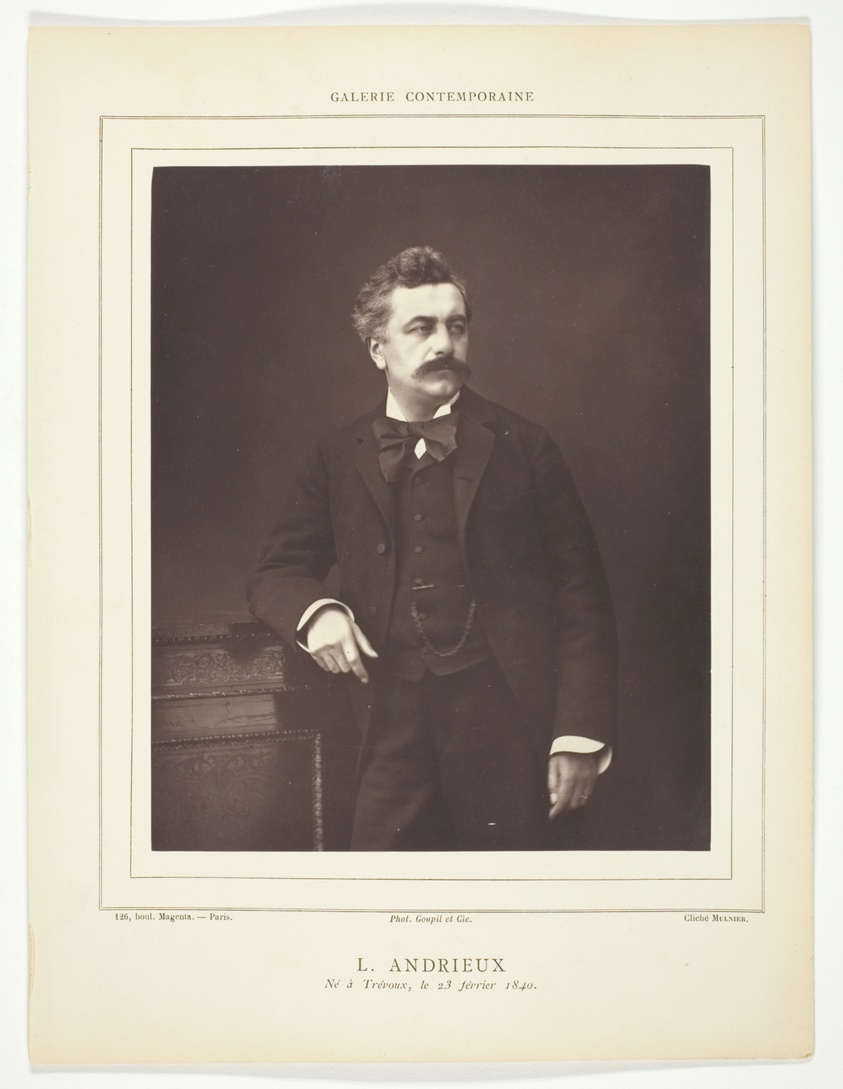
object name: Photograph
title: L. Andrieux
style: 19th century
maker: Ferdinand J. Mulnier (French, active 1860–1890)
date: c. 1876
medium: Woodburytype, from the periodical “Galerie Contemporaine Littéraire, Artistique” (1879), volume 8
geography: France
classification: woodburytype; photomechanical process; photography; photograph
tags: Collected by Hugh Edwards, portraits, portraits: male subject, photography, Contemporaine Littéraire